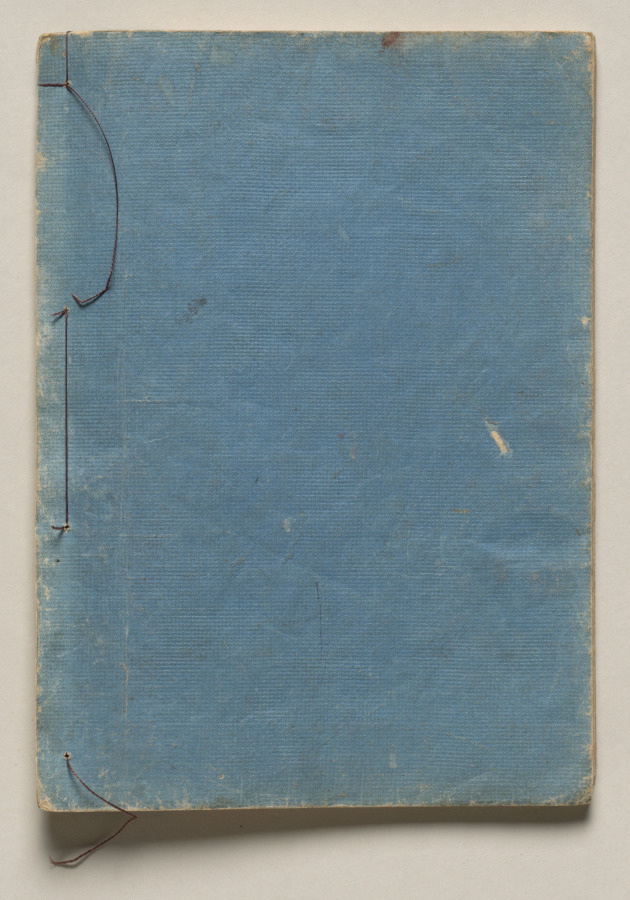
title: Volume Five of People of Japan in Light Verse (Kyōka)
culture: Japan, Edo period (1615–1868)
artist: Utagawa Hiroshige (Japanese, 1797–1858)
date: 1857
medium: Woodblock-printed book; ink and color on paper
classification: Bound Volume